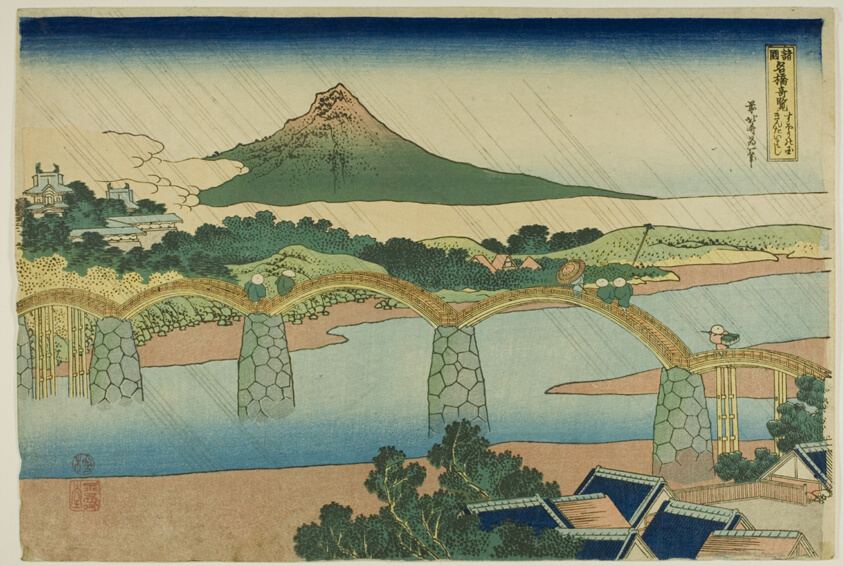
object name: Print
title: Kintai Bridge in Suo Province (Suo no kuni Kintaibashi), from the series "Unusual Views of Famous Bridges in Various Provinces (Shokoku meikyo kiran)"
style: Japanese (culture or style)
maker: Katsushika Hokusai 葛飾 北斎; Japanese, 1760–1849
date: c. 1833/34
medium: Color woodblock print; oban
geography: Japan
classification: woodblock print; print